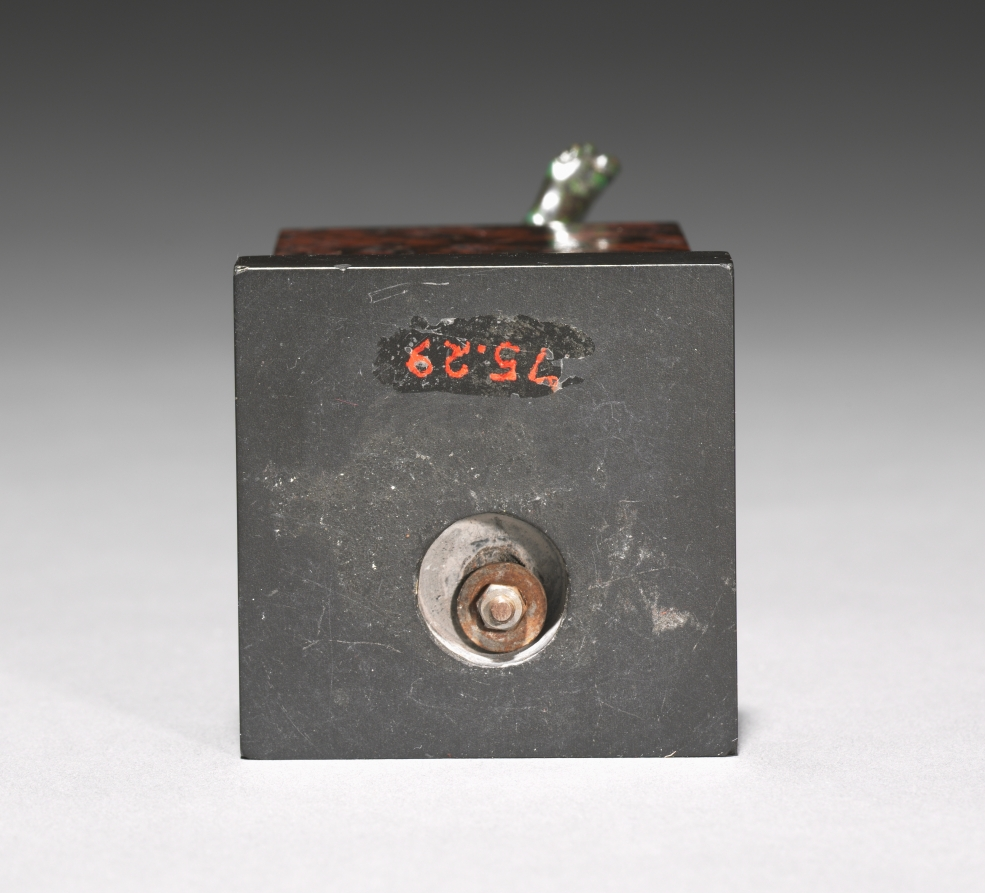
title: Dancing Boy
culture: Northern Italy, early 16th century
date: c. 1500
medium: bronze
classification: Sculpture